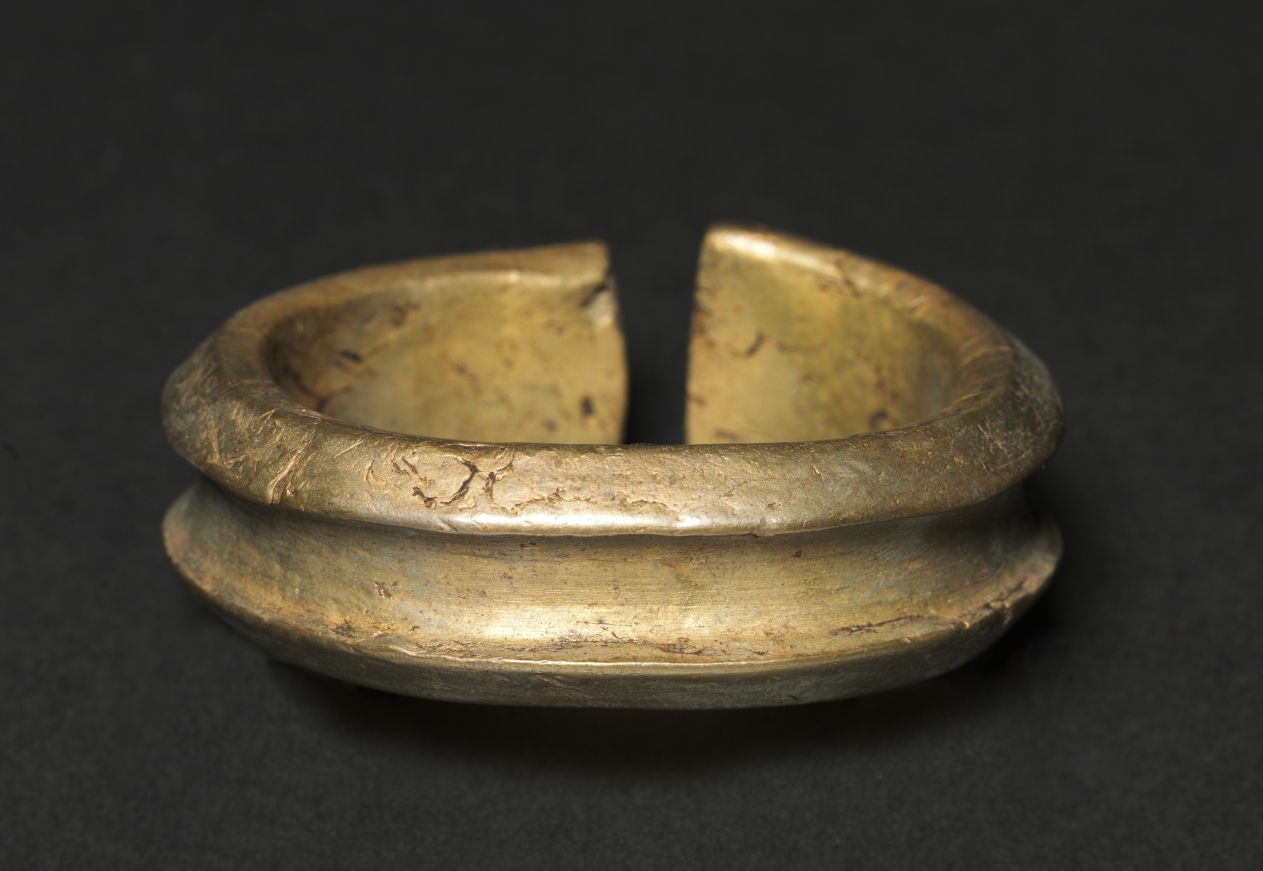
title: Bracelet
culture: Equatorial Africa, Gabon, Fang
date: 1900s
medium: Copper alloy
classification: Jewelry